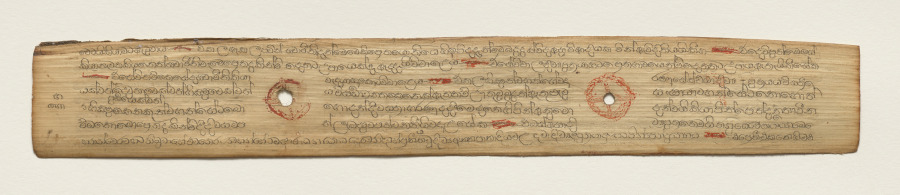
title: Leaf from a Buddhist Manuscript (recto)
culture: Sri Lanka, Singhalese, Late 17th century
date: c. 1700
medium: fiber paper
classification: Manuscript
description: Palm leaf material is still used for manuscripts in Sri Lanka. The palm leaves are prepared first by boiling them, drying them in the sun, and then rubbing them with oils. Scribes then use a metal stylus to incise the text. Then charcoal powder is wiped across the pages, filling in only the inscribed lines.